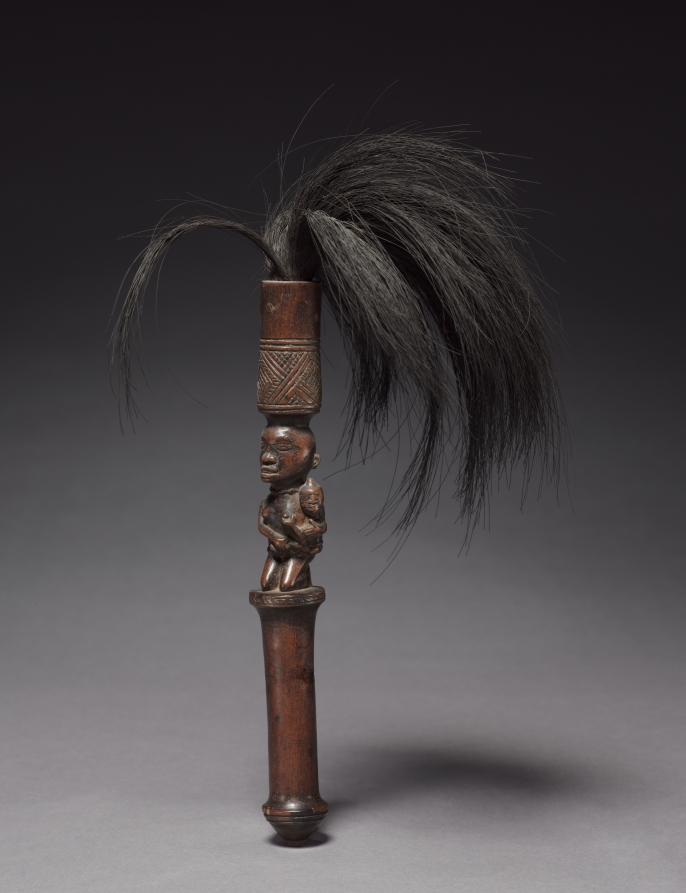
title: Flywhisk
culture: Africa, Central Africa, Democratic Republic of Congo (most likely), Cabinda, or Republic of the Congo, probably Yombe-style maker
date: late 1800s-early 1900s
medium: Wood and animal hair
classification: Sculpture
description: In Central Africa, flywhisks denoted status, rank, and function, rather than used to whisk away flies. Commonly associated with chiefs and titleholders, they were also owned by diviners and healers. Their purpose may also have been used to purify spaces, bless people, places, or things, and settle disputes. Flywhisks rarely depict women; yet this finely carved miniature of a woman kneeling signifies obedience and respect.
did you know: Rarely do flywhisks depict a female figure.